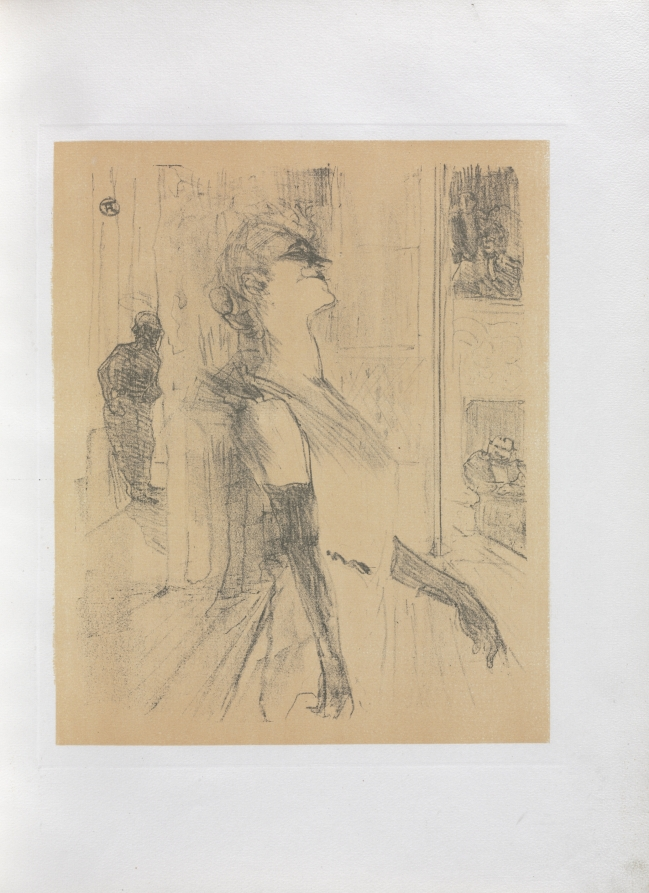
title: Yvette Guilbert-English Series: Sur la scene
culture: France, 19th century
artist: Henri de Toulouse-Lautrec (French, 1864–1901)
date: 1898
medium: lithograph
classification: Bound Volume